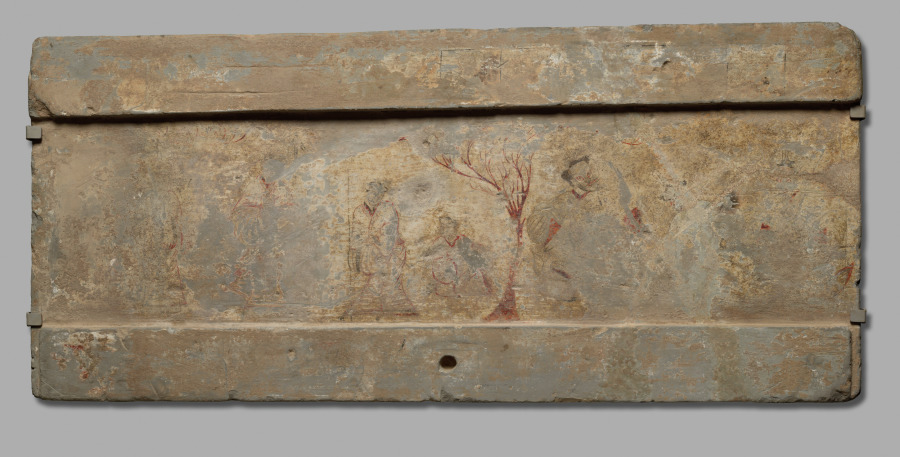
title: The Killing of Three Warriors with Two Peaches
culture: China, Han dynasty (202 BCE–220 CE)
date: 202 BCE–220 CE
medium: painted tile, black and red color on slip over gray earthenware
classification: Painting